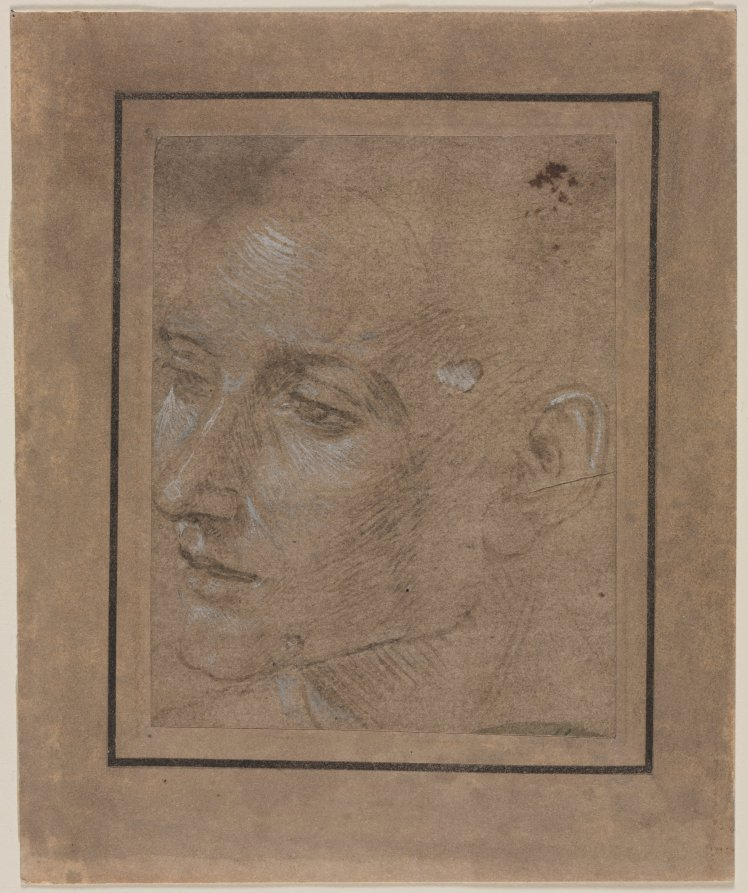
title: Head of a Young Man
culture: Italy, 15th century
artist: Filippino Lippi (Italian, c. 1457–1504)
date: second half 1400s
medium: point of brush and brown wash and brush and brown wash heightened with lead white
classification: Drawing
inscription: FRAGMENT OF OLD MOUNT (now removed): [illegible] / [illegible] ; in blue ink: Fillipino Lippi [underlined] / Silbers tip. Zeich . ; in graphite: 242 [underlined]